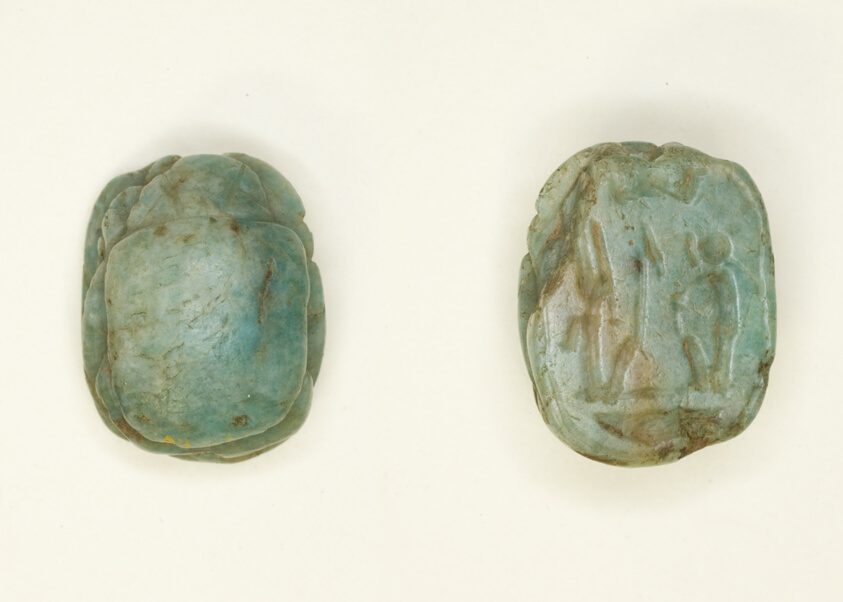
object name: Costume and Accessories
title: Scarab: Two Seated Deities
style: new kingdom, nineteenth dynasty, ancient, ramesside period, twentieth dynasty, egyptian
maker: Egyptian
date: New Kingdom, Ramesside Period, Dynasties 19–20 (about 1295–1069 BCE)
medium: Stone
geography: Egypt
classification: scarab; stone; ancient art; costume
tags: deities, gods (deities), Hieroglyphs, insects